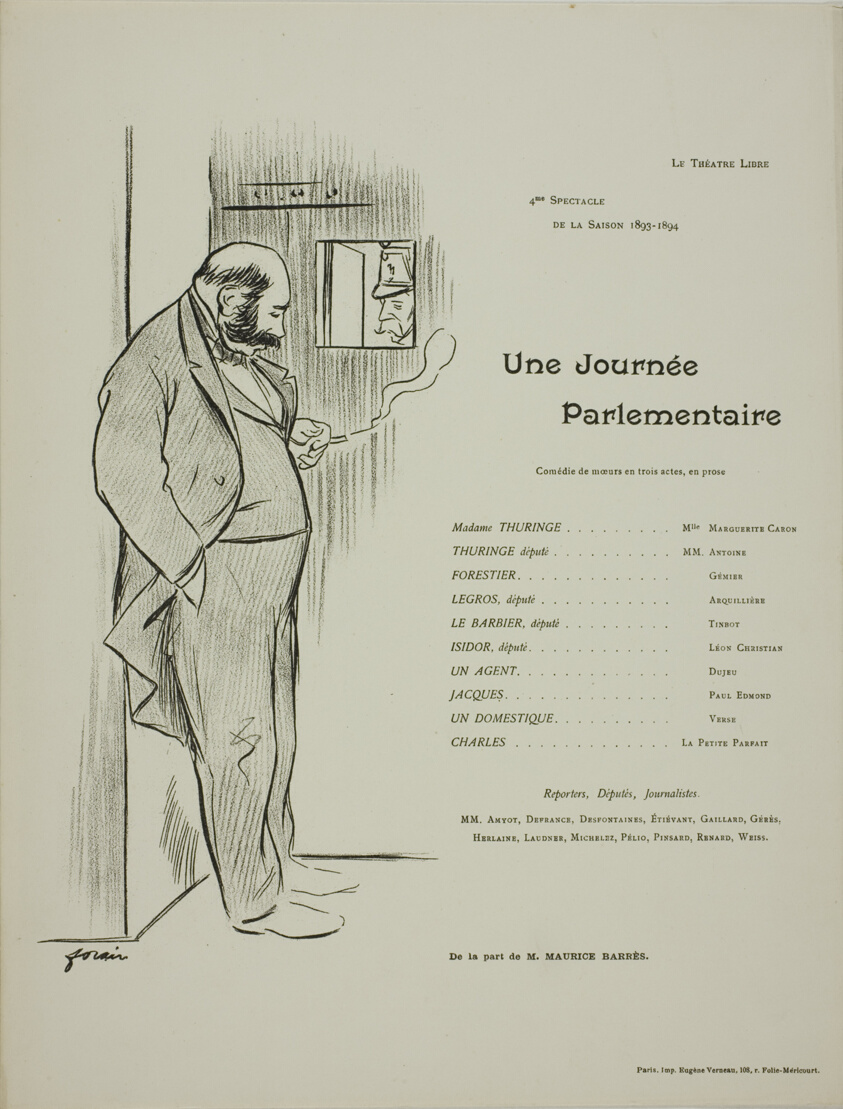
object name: Print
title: Theater Program for Une Journee Parlementaire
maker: Jean Louis Forain (French, 1852-1931)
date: 1893–94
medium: Lithograph on ivory wove paper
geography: France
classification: lithograph; print; prints and drawing